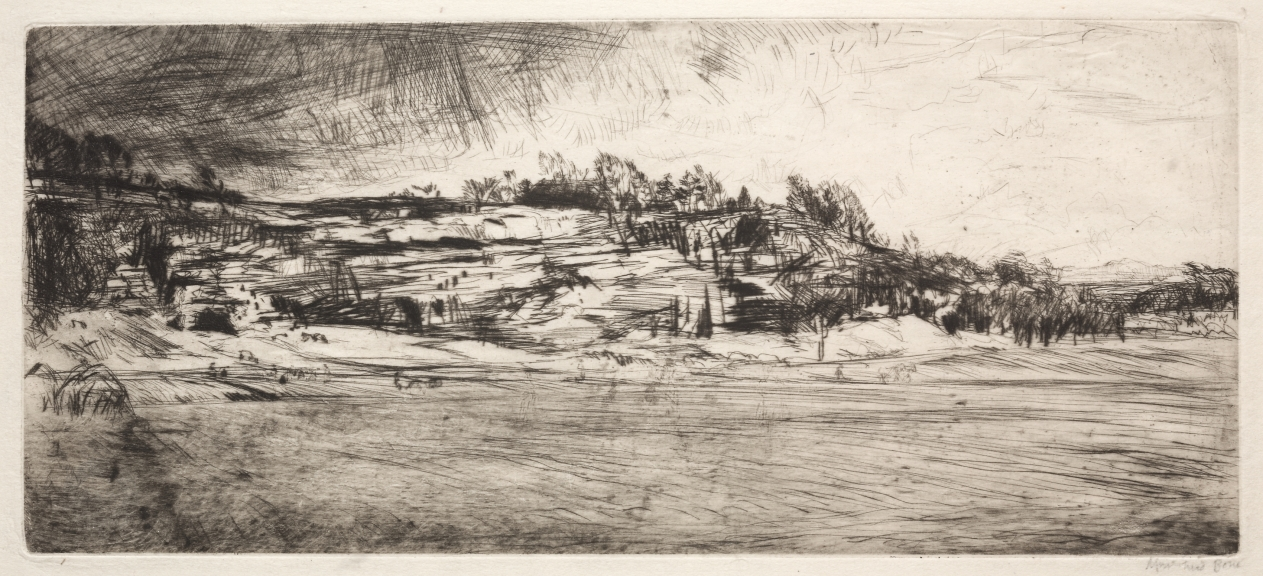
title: Spring at Cardross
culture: England, 20th century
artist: Muirhead Bone (British, 1876–1953)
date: 1900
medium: drypoint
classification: Print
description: A Glasgow artist with architectural training, Bone began to make prints in 1898. One of his earliest drypoints, Spring at Cardross already demonstrates Bone’s brilliant draftsmanship and atmospheric use of plate-tone. In abbreviated strokes, the artist described a panoramic view of the landscape of Dumbartonshire, Scotland.